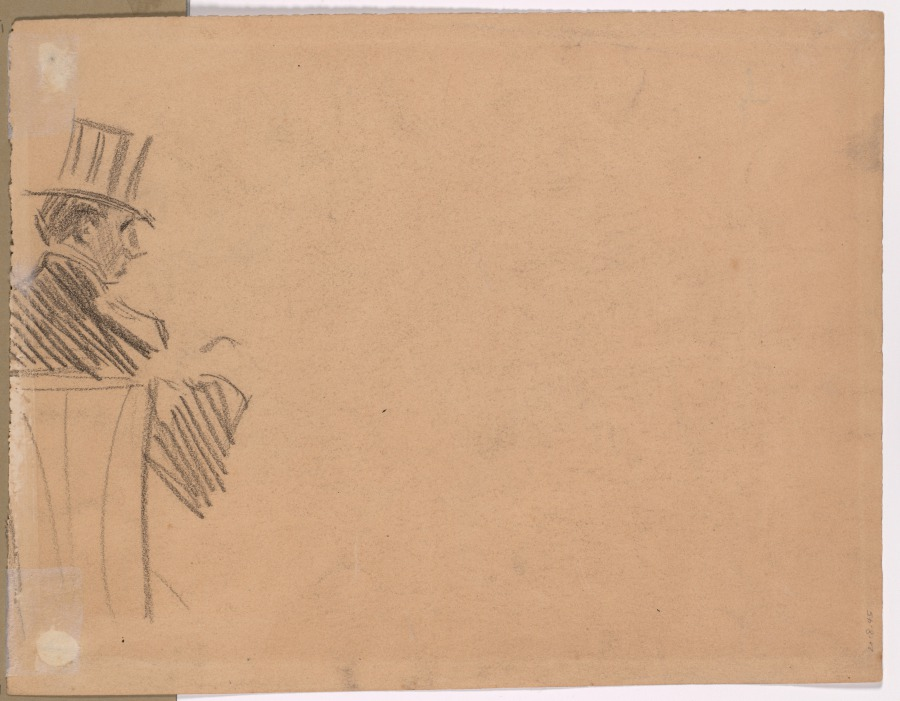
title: Right Profile of Man Wearing Tall Hat (verso)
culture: France, 19th century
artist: attributed to Jean Louis Forain (French, 1852–1931)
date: late 1800s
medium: Charcoal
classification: Drawing